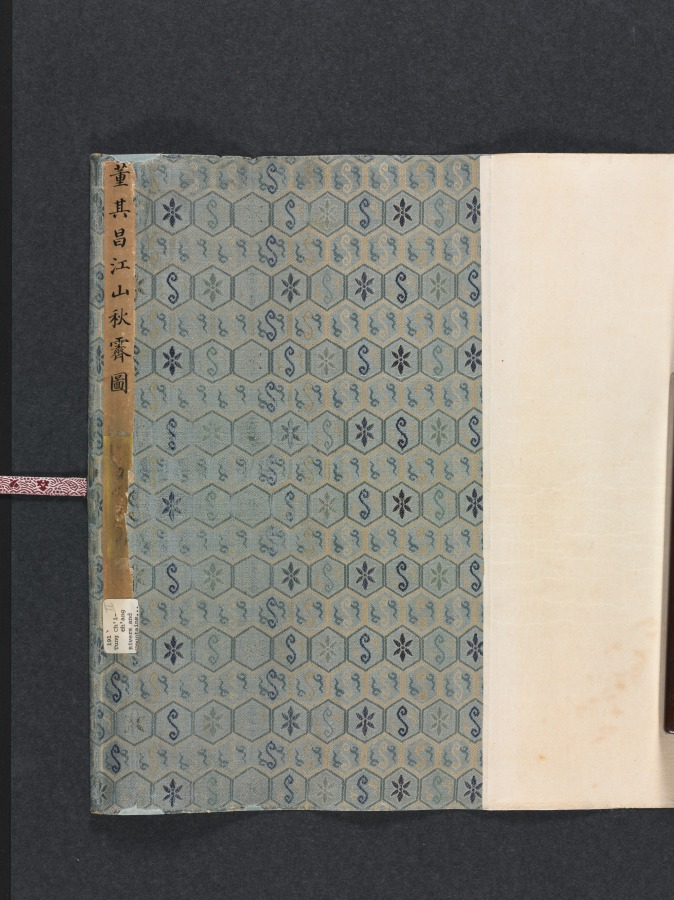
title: River and Mountains on a Clear Autumn Day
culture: China, Ming dynasty (1368–1644)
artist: Dong Qichang (Chinese, 1555–1636)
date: c. 1624–27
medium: Handscroll; ink on Korean paper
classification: Painting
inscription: 黃子久江山秋霽似此，當恨古人不見我也。思翁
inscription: 董文敏每遇高麗鏡面箋，書畫尤為入神。此卷改表紙用之，字跡隱然，兼有朝鮮之印。至於筆法圓秀，真接倪黃。豈文沈所可同日而語也。 康熙庚午中秋後一日，天氣澄爽，重裝初畢，跋於瓶廬。抱瓮翁高士奇。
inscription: Second inscription by Gao Shiqi 高士奇 (1645–1704): On the twenty-third day of the ninth month, the jiaxu year of the Kangxi era [1694], I packed my bags to head north. When my boat passed Wuchang [Suzhou], Mr. Mantang [Song Luo] brought wine to bid me farewell so that we could share our thoughts on our separation in the last few years. I showed him the paintings and calligraphy which I collected and asked his opinions. Since Mr. Mantang does not own any handscrolls by Wenmin [Dong Qichang], I leave this one for him in commemoration of our parting; thus the painting will have a worthy owner and our meeting will become a beautiful story in the future. It is the fourth day after the beginning of winter, with the sky clear and sober. Trees under frost have turned red and yellow, seemingly echoing the brush and ink in the painting. I also ask Mr. Mantang to inscribe a poem to commemorate our meeting so that it will survive forever.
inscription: 1 colophon and 4 seals of Song Luo 宋犖 (1634–1713): Who is the foremost art connoisseur of our dynasty?/ Tangcun [Liang Qingbiao, 1620–1691] is dead, so the title passes to Jiangcun [Gao Shiqi]./ Leaving office, you retired for five years in the Lake region./ Fondling handscrolls and hanging scrolls from morning to evening./ You sent me your collection catalogue Xiao Xia Lu last year;/ It is indeed the true equal of [Zhou Mi's] Yun Yan Guo Yan./ This year you returned to the capital by imperial order;/ Your boat with calligraphy and paintings anchored at the river bank in Suzhou./ When we met each other you did not waste any time for conversation by poured out immediately/ From your "coral net" extraordinary treasures./ You produced incomparable scrolls, with gold-inscribed labels and jade rollers,/ Pouring out from bags and trunks, they were spread in disarray./ Without a word, I rolled and unrolled until my fingers were numbed,/ We sat straight, facing each other quietly, and never felt tired./ For three days we forgot about sleeping and food./ And at times we shouted our joy out loud, forgetting who is host or guest./ Your Dwelling in the Fuchun Mountains and the Yuansheng manuscript/ These peerless works I myself examined with delight./ As an added pleasure to the farewell dinner under the Maple Bridge,/ You allowed me to hold again this handscroll by Dong Qichang--/ The Misty River and Piled Peaks [by Zhao Mengfu] and this Clear Autumn Day are two extraordinary masterpieces./ In showing such life and spirit with "qi yun." the artists were truly "men of heaven."/ The Clear Autumn Day is not even three feet long,/ Painted on tributary Korean paper, it shines like silver./ Every building up and every turn of the mountains imitates nature,/ Every tree and every rock is removed from the commonplace./ From the beginning, the theory of poetry is the theory of painting,/ Like the lotus and the morning sunshine, they complement and refresh each other./ The artist's inscription regrets that "the Old Masters cannot see my scroll."/ Huang Gongwang would have agreed in his grave./ The vermilion of the seals glitter and dazzles the eyes,/ These added accessories are as valuable as jade./ You are very kind to give it to me,/ The feelings expressed in your inscription are so sincere./ Wanting to refuse, but unable, I accept it to respect your wish,/ And taking off my gown and cap I wrapped it with care./ You asked me to write a long poem in commemoration of this beautiful occasion,/ I am too ashamed that my effort in response is so poor and inadequate./ Returning home, I unrolled it under candlelight, trying to write the colophon,/ The light of the waning moon shines at the foot of the mossy wall./ Earnestly humming and brows knit in deep thought, I try to compose;/ The verses are not outstanding, but the facts are real./ With this poem recorded at the end of the scroll, I mail it to you for approval,/ This poem and this painting shall outlast a thousand springs. (Translation by LYSL/HK/WKH)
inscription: 1 colophon and 2 seals of Shao Changheng 邵長蘅 (1637–1704); 2 inscriptions and 14 seals of the Qianlong 乾隆 emperor (r. 1736–95); 1 seal of the Jiaqing 嘉慶 emperor (r. 1796–1820); 3 seals of the Xuantong 宣統 emperor (r. 1908–11); 1 seal unidentified.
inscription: [印] 朝鮮國王之印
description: Dong Qichang had a tremendous impact on the artistic practices and historiography of later generations; his works and writings shaped literati aesthetics. Here, Dong places an abstract landscape composition diagonally across the picture plane, configured to recall earlier masters and simultaneously express his own personal style. Dong’s inscription claims, Huang Gongwang’s Autumn Day, looks like this. I truly regret the master has not seen my work. In fact, Dong Qichang may have had Dong Yuan’s Xiao and Xiang Rivers in mind, a work he owned and considered a key work in Chinese art history.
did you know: The painting has an imprint of a Korean seal that reads "Seal of the king of Joseon."